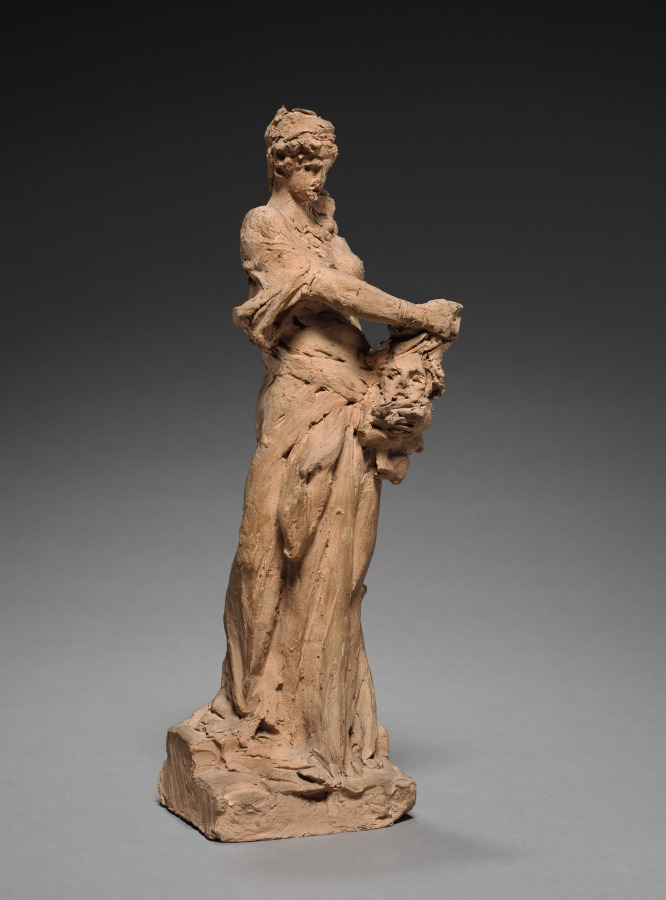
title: Judith with the Head of Holofernes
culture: France, 19th century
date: mid-1800s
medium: terracotta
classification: Sculpture